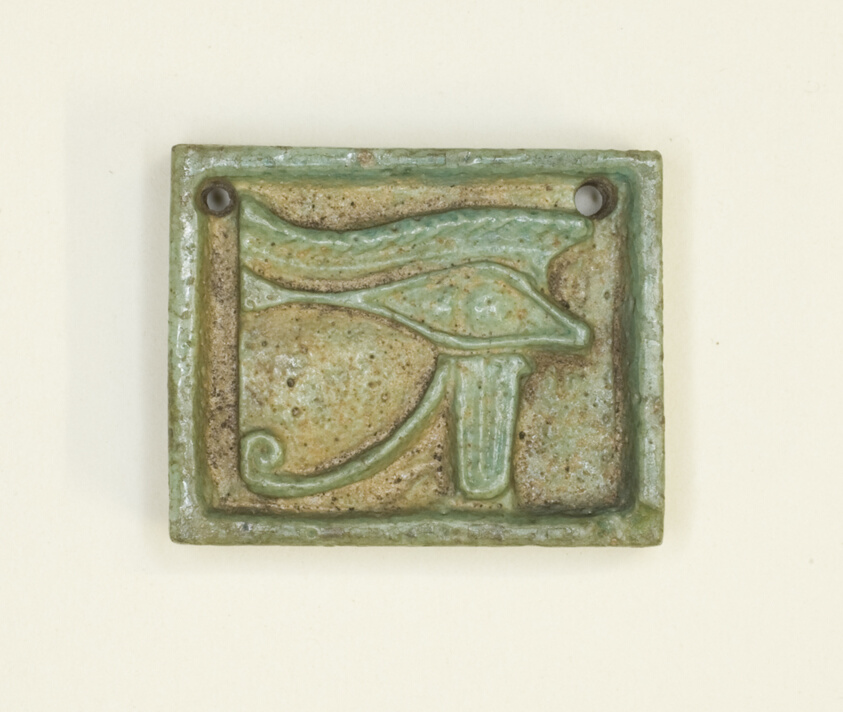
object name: Costume and Accessories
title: Eye of Horus (Wedjat) Amulet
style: late period (egyptian), ancient, egyptian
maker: Egyptian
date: Late Period, Dynasty 26–30 (664–343 BCE)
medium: Faience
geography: Egypt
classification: amulet; ceramics; jewelry; ancient art; costume; faïence (composite material)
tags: eye of Horus